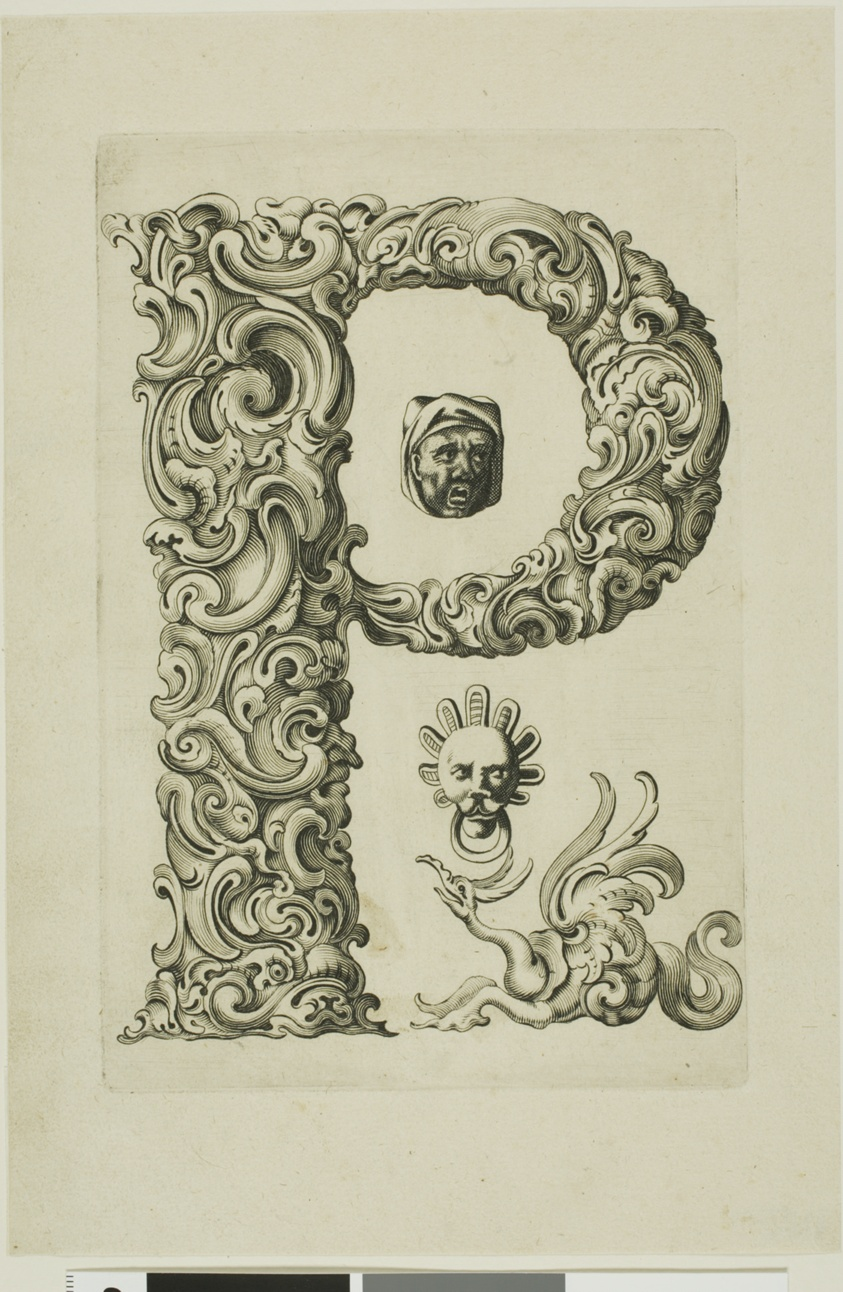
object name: Print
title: Letter P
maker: Peter Aubry (German, 1596-1668)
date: 1630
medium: Engraving on paper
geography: Germany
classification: engraving; print; prints and drawing